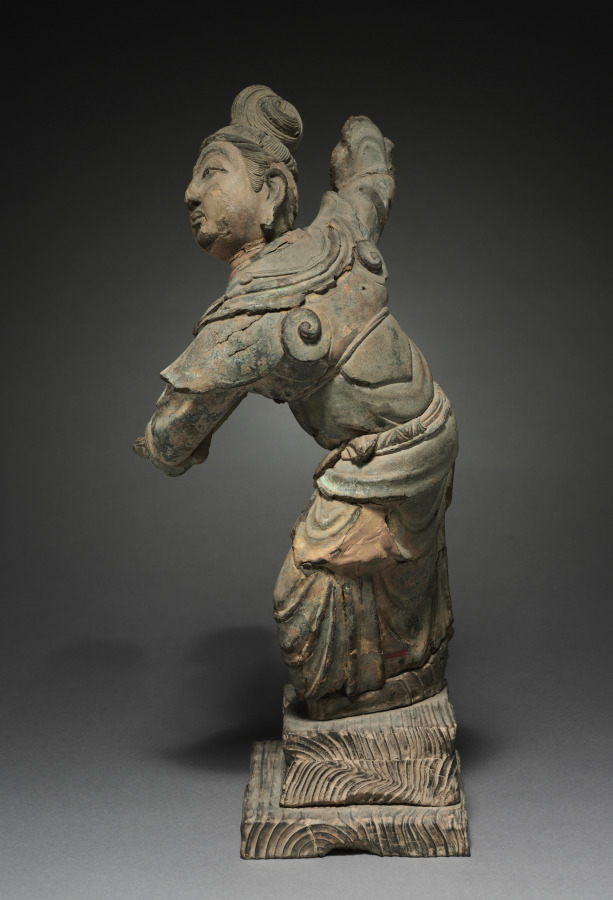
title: Dancing Apsaras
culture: China, late Tang dynasty (618–907) to Five dynasties (907–960)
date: 900s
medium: dry lacquer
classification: Sculpture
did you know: The sculpture was made from a rare technique involving alternate layers of cloth and lacquer, modeled on an armature or around a removable clay core.